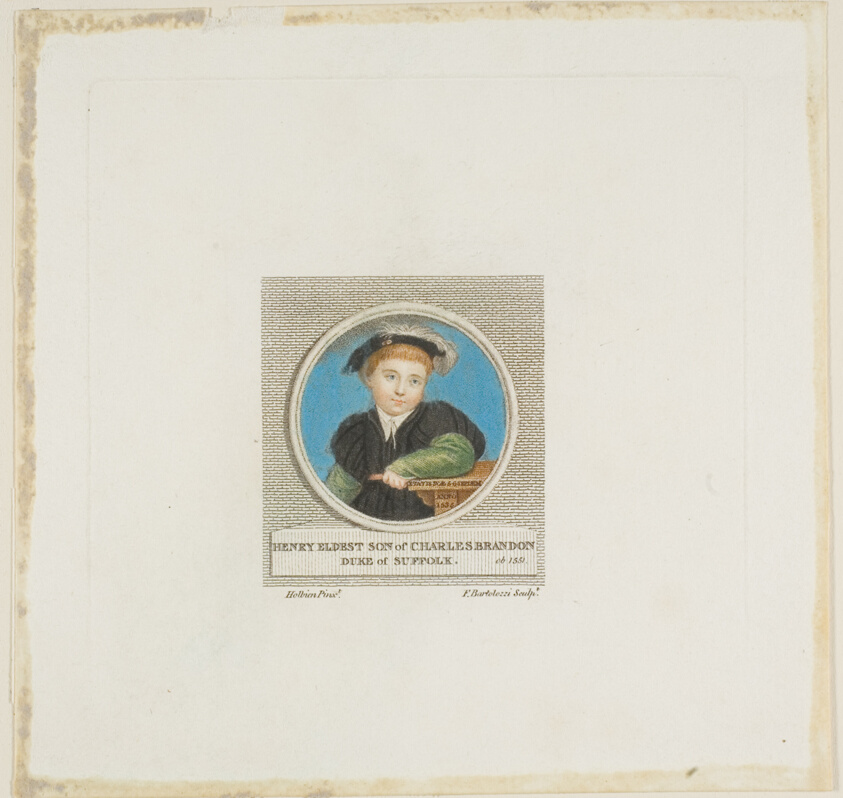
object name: Print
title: Henry Brandon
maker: Francesco Bartolozzi (Italian, 1727-1815); after Hans Holbein the younger (German, 1497-1543)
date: published March 26, 1798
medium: Color stipple engraving on paper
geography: Italy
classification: engraving; print; prints and drawing